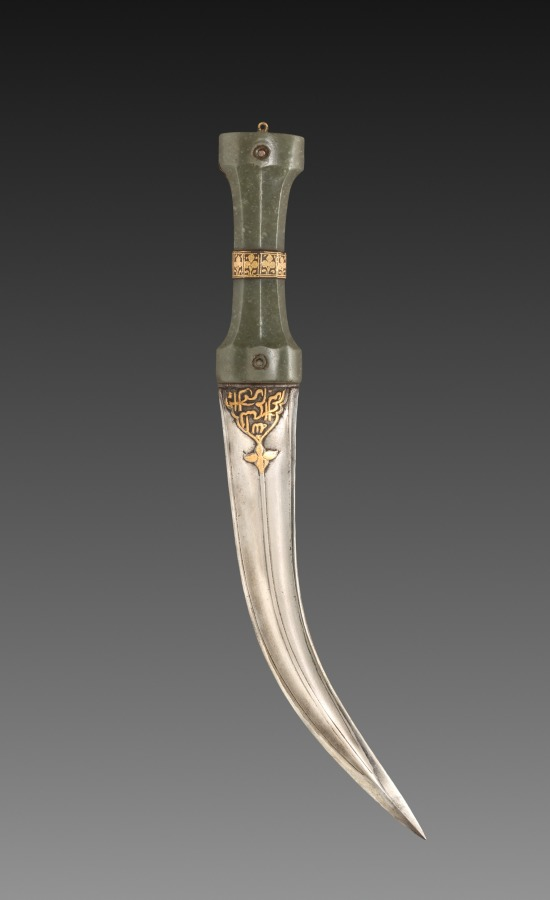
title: Dagger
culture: India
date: 1700s–1800s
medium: Jade hilt with iron and gold; steel blade with iron and gold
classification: Arms and Armor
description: Daggers with curved blades, known as khanjar, were worn tucked into the belt as one of the basic accessories for Mughal men. An all-purpose knife that could be used in hunting or fighting, the khanjar was also a visible status symbol. The use of jade and gold indicates that this dagger was owned by a member of the court. The gold inscriptions on the blade, just under the hilt, are quotations from the Qur’an, the most sacred book for Muslims. On one side is the opening line: “In the Name of God the Merciful and the Compassionate,” and on the other is a popular verse from chapter (sura) 61: “Help comes from God, and Victory is imminent.”